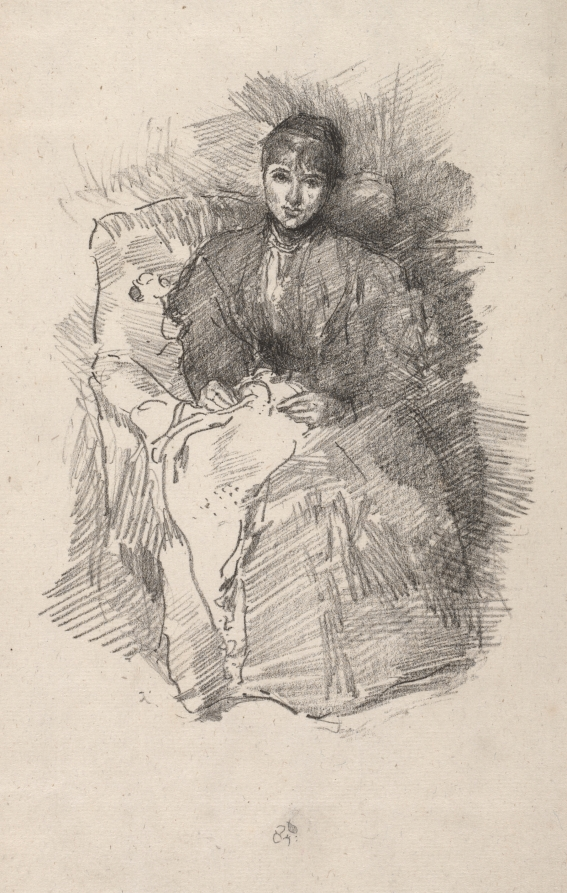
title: Needlework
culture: America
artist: James McNeill Whistler (American, 1834–1903)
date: 1896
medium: lithograph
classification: Print